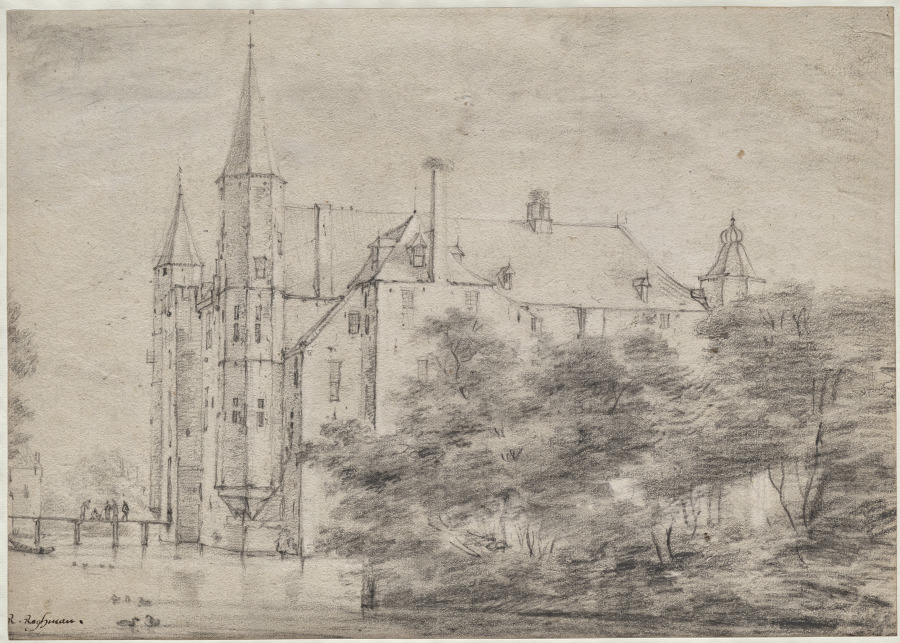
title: Zuylen Castle Near Utrecht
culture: Netherlands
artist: Roelant Roghman (Dutch, 1627–1692)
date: c. 1646–47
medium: black chalk on paper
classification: Drawing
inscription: In black ink, recto, lower left: "R. Roghman (signed)"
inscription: in black ink, recto, lower right: "Zuylen"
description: Zuijlen Castle Near Utrecht by Dutch artist Roelant Roghman is one of more than 200 drawings the artist made featuring castles, manor houses, and fortresses during a tour around the Netherlands. The artist traveled on foot to capture the present state of the buildings after a long and protracted war with Spain. He used large sheets of paper and combined ink wash and charcoal, capturing the buildings on the spot and then embellishing each with landscape elements.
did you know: In the 1640s, the artist Roelant Roghman spent two years traveling by foot and drawing manor houses, fortresses, and civic buildings throughout the Netherlands.